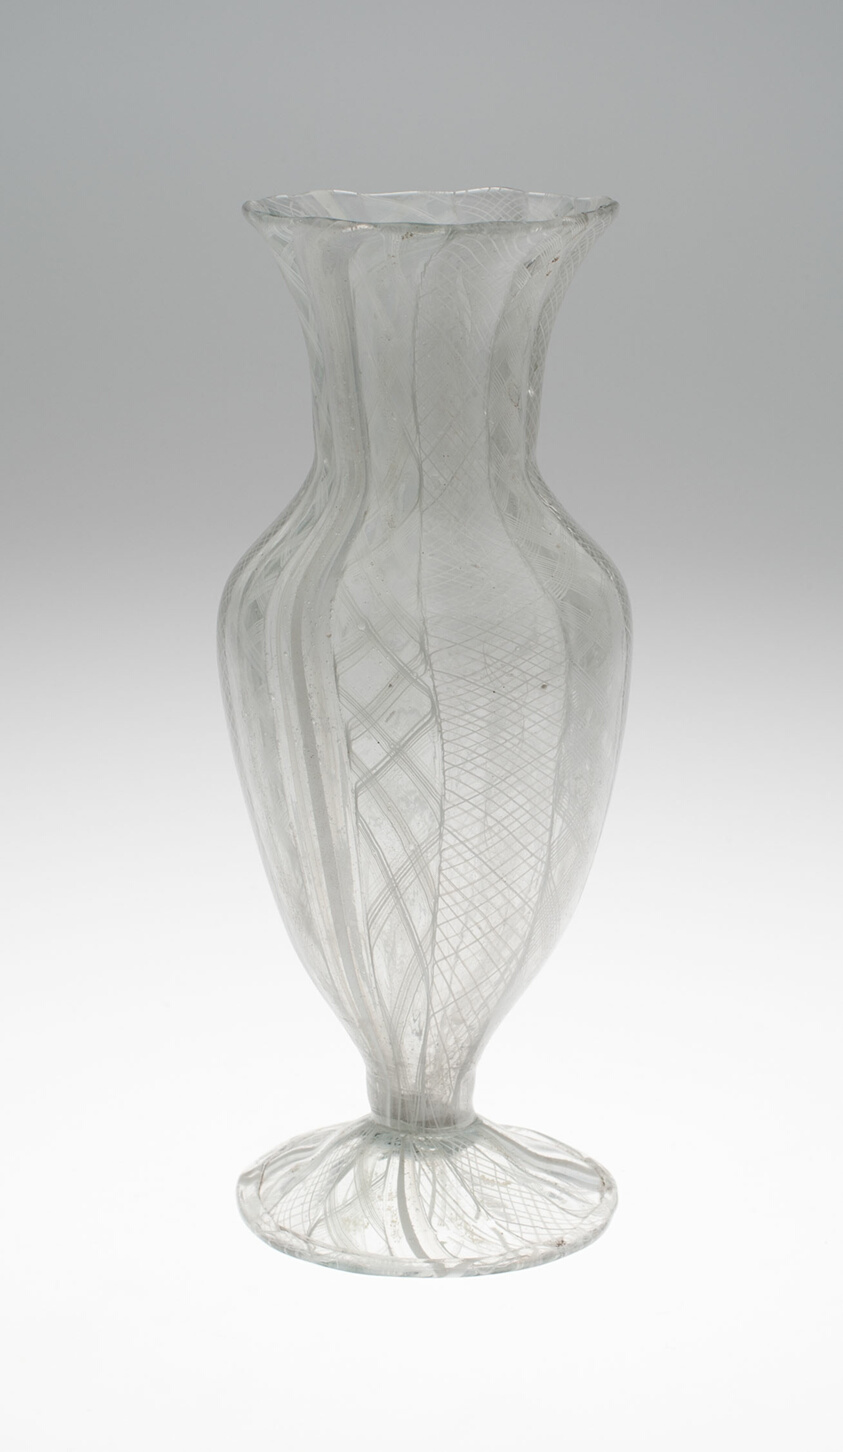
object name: Glass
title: Vase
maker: Italy or Germany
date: late 19th or early 20th century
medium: Glass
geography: Italy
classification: vase; vessel; glass; european decorative arts